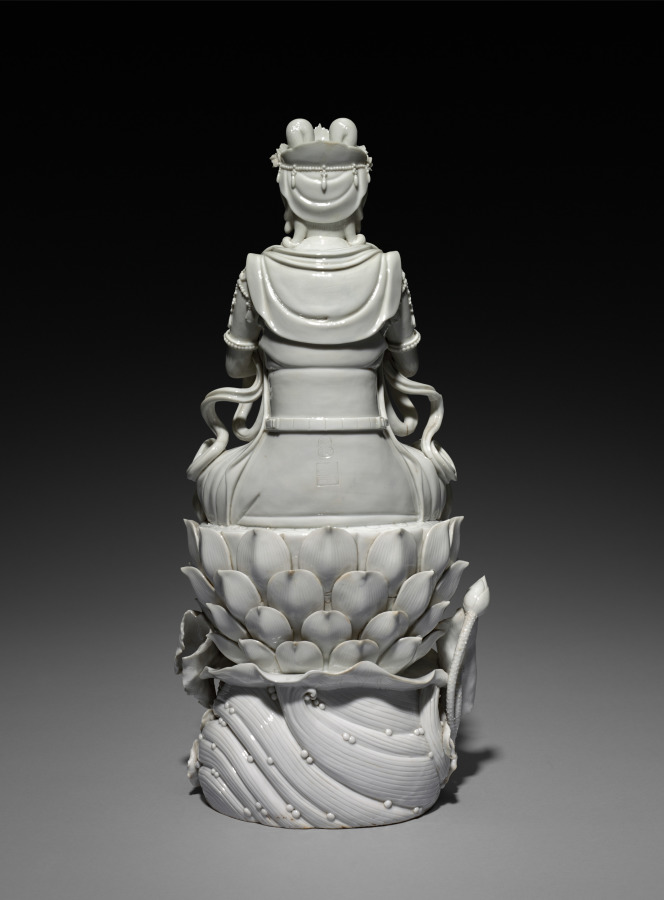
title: Bodhisattva Guanyin of the South Sea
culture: China, Fujian Province, Ming dynasty (1368-1644) - Qing dynasty (1644-1911)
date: 1600s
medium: Porcelain with white glaze, Dehua ware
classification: Ceramic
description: Guanyin, the Buddhist bodhisattva of infinite compassion (Avalokiteshvara in Sanskrit), is the most revered enlightened being in East Asia. The bodhisattva perceives all beings in need of help and reveals himself in many forms. Here, his elaborate lotus pedestal rests on the crest of surging waves, identifying him as Guanyin of the South Seas. The Dehua kilns in Fujian province in southern China produced white porcelain figures for both the domestic and export markets. In China, such a figure may have furnished a house altar or a temple.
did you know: When Marco Polo visited China in the late 1200s, he was so impressed by the Dehua kilns that he included lengthy descriptions of ceramic production in his chronicle of his journey.